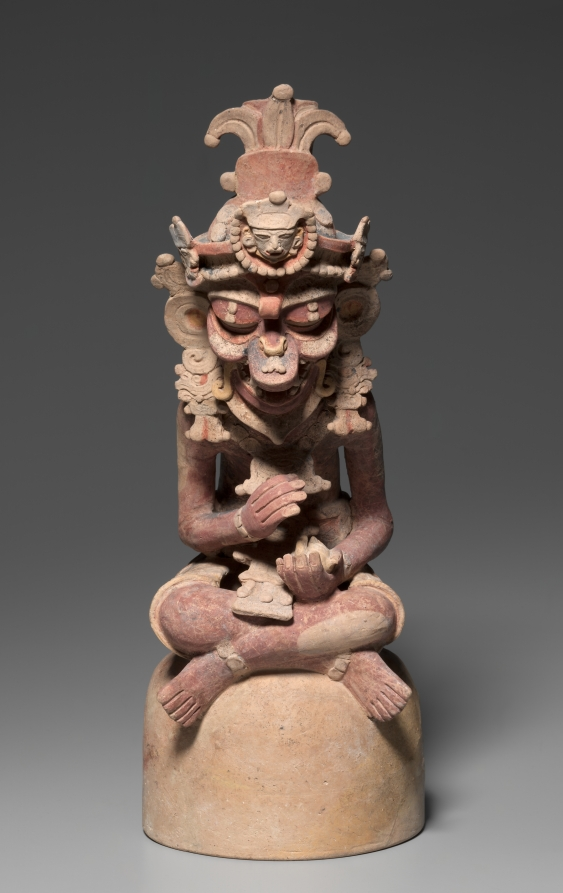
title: Artisan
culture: Guatemala, Petén region, Maya style (250-900), Maya style (250-900)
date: 250–600 CE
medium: earthenware with colored slips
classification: Sculpture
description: These figures represent the supernatural patrons of the visual arts and writing: the brothers Hun Batz and Hun Chuen ("One Monkey" and "One Artisan"). The two were refined artists but also bullies who tormented their younger brothers, who took revenge by transforming their elders into monkeys. Many Maya representations of the painter-scribes immortalize this fate by depicting the pair with both simian and human features, as here. The brothers are shown engaged in artistic or scribal pursuits. Sitting on high-domed bases that may have served as the lids of incense or offering bowls, each apparently once grasped a tool in his upper hand-for instance, a paint brush or a stylus for writing. In the lower hand, one cradles a small mask and the other, a piece of bark that likely refers to the beaten bark from which the Maya made books.